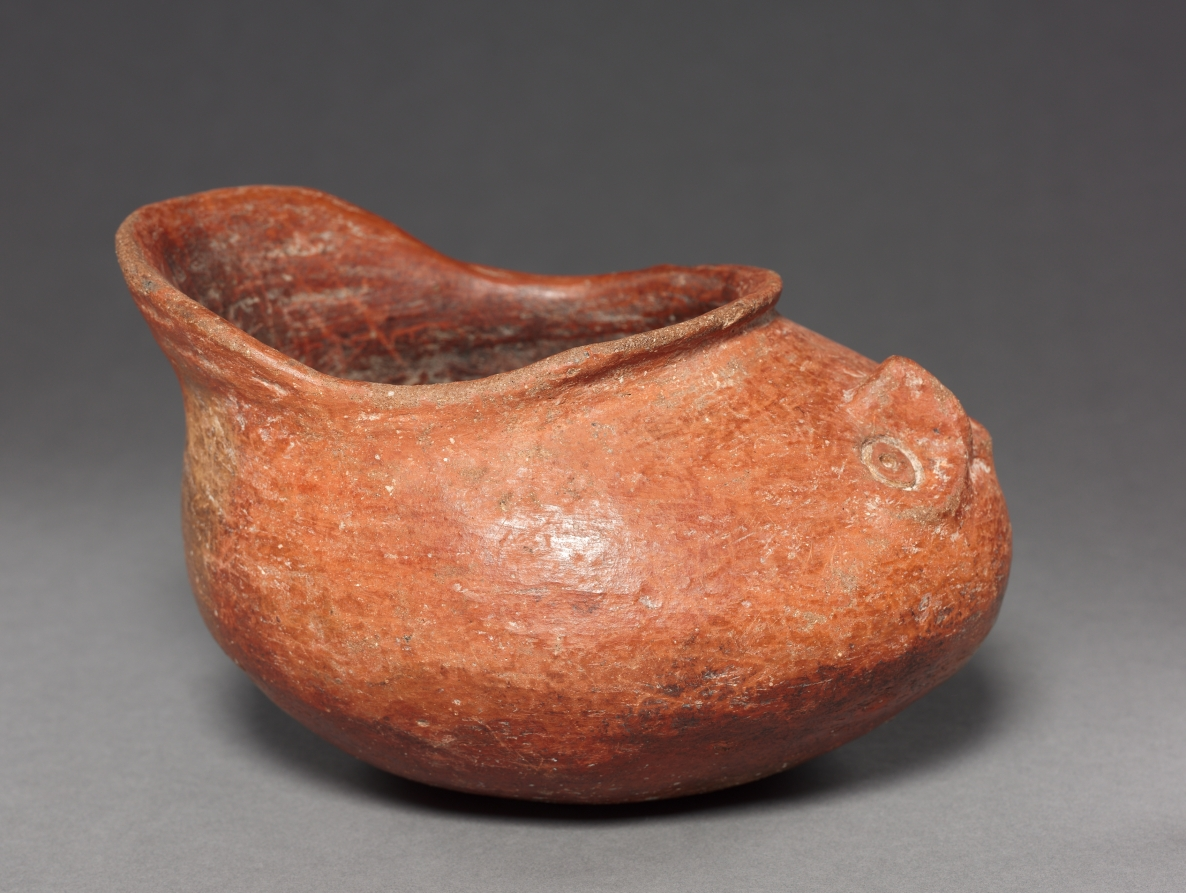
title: Head Effigy Bowl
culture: Mexico, Region of Tilantongo, District of Tlaxiaco, Nayarit style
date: 100 BCE–300 CE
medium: pottery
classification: Ceramic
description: After about 200 BC, West Mexican chieftains gained in authority, their new status reflected in shaft tombs that shelter not only their remains but also lavish offerings, including sculptural ceramics. Many of the ceramics may refer to the crucial activities of a chief’s life, such as marriage, feasting, and war. The meaning of this unusual bowl—a head whose gaping mouth serves as the aperture—is unknown.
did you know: Ancient Nayarit art is celebrated for its timeless, often lighthearted expressions of humanity.